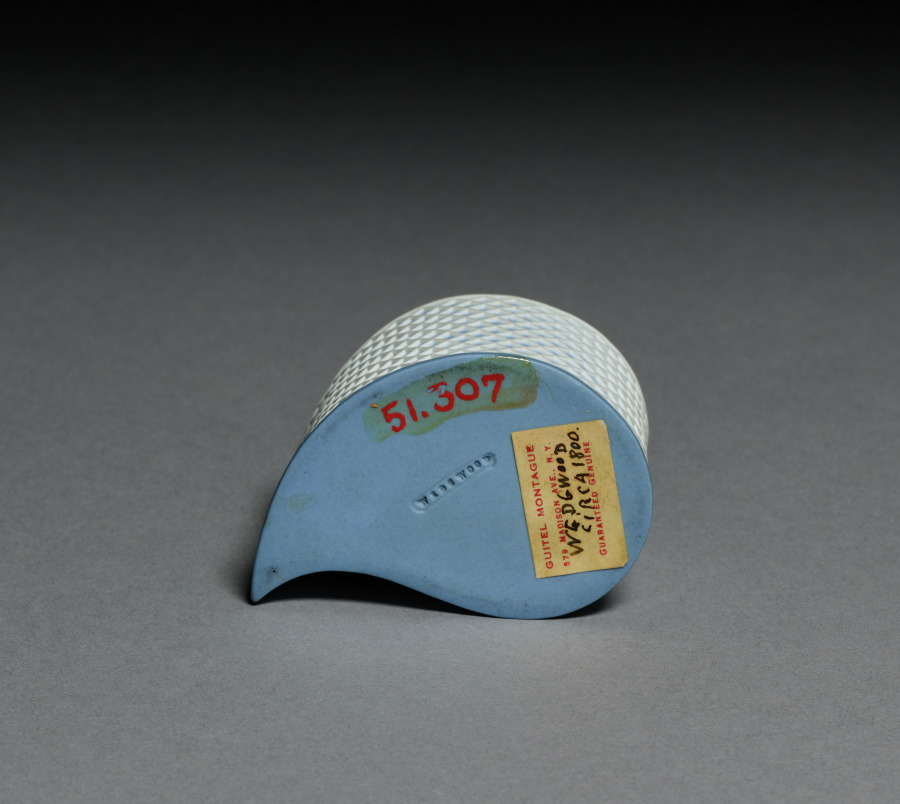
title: Custard Cup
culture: England, Staffordshire, 18th century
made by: Wedgwood Factory (British)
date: c. 1785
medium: jasper ware with relief decoration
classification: Ceramic